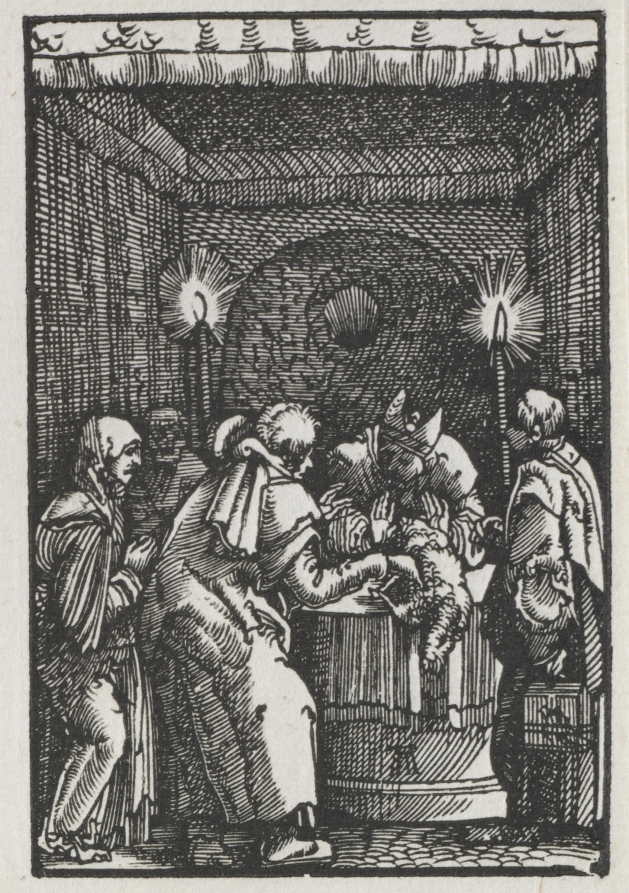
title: The Fall and Redemption of Man: Joachim's Offering Rejected by the High Priest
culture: Germany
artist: Albrecht Altdorfer (German, c. 1480–1538)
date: c. 1515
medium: woodcut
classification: Print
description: These eight woodcuts come from a series of forty which illustrate the story of Christian redemption from original sin to the Last Judgement. Probably to maximize printing efficiency and quality, eight woodblocks were printed on each of five sheets of paper, but the subjects are not in the correct chronological order. Prior to sale, the sheets were cut into eight pieces. The sheets in the museum's set were only cut in half, preserving four prints per page. The numbers after the titles of the individual images indicate each scene's place within the narrative. By 1513, Altdorfer had already executed a number of small, finely detailed engravings. Because it is difficult to achieve the same degree of precision using woodcut, The Fall and Redemption of Man is a technical tour de force. Probably inspired by Albrecht Dürer's Small Passion (1511)-but almost double the size-the only contemporaneous comparable set of fine miniature woodcuts, Dance of Death, was designed by Hans Holbein in about 1526 (on view nearby).